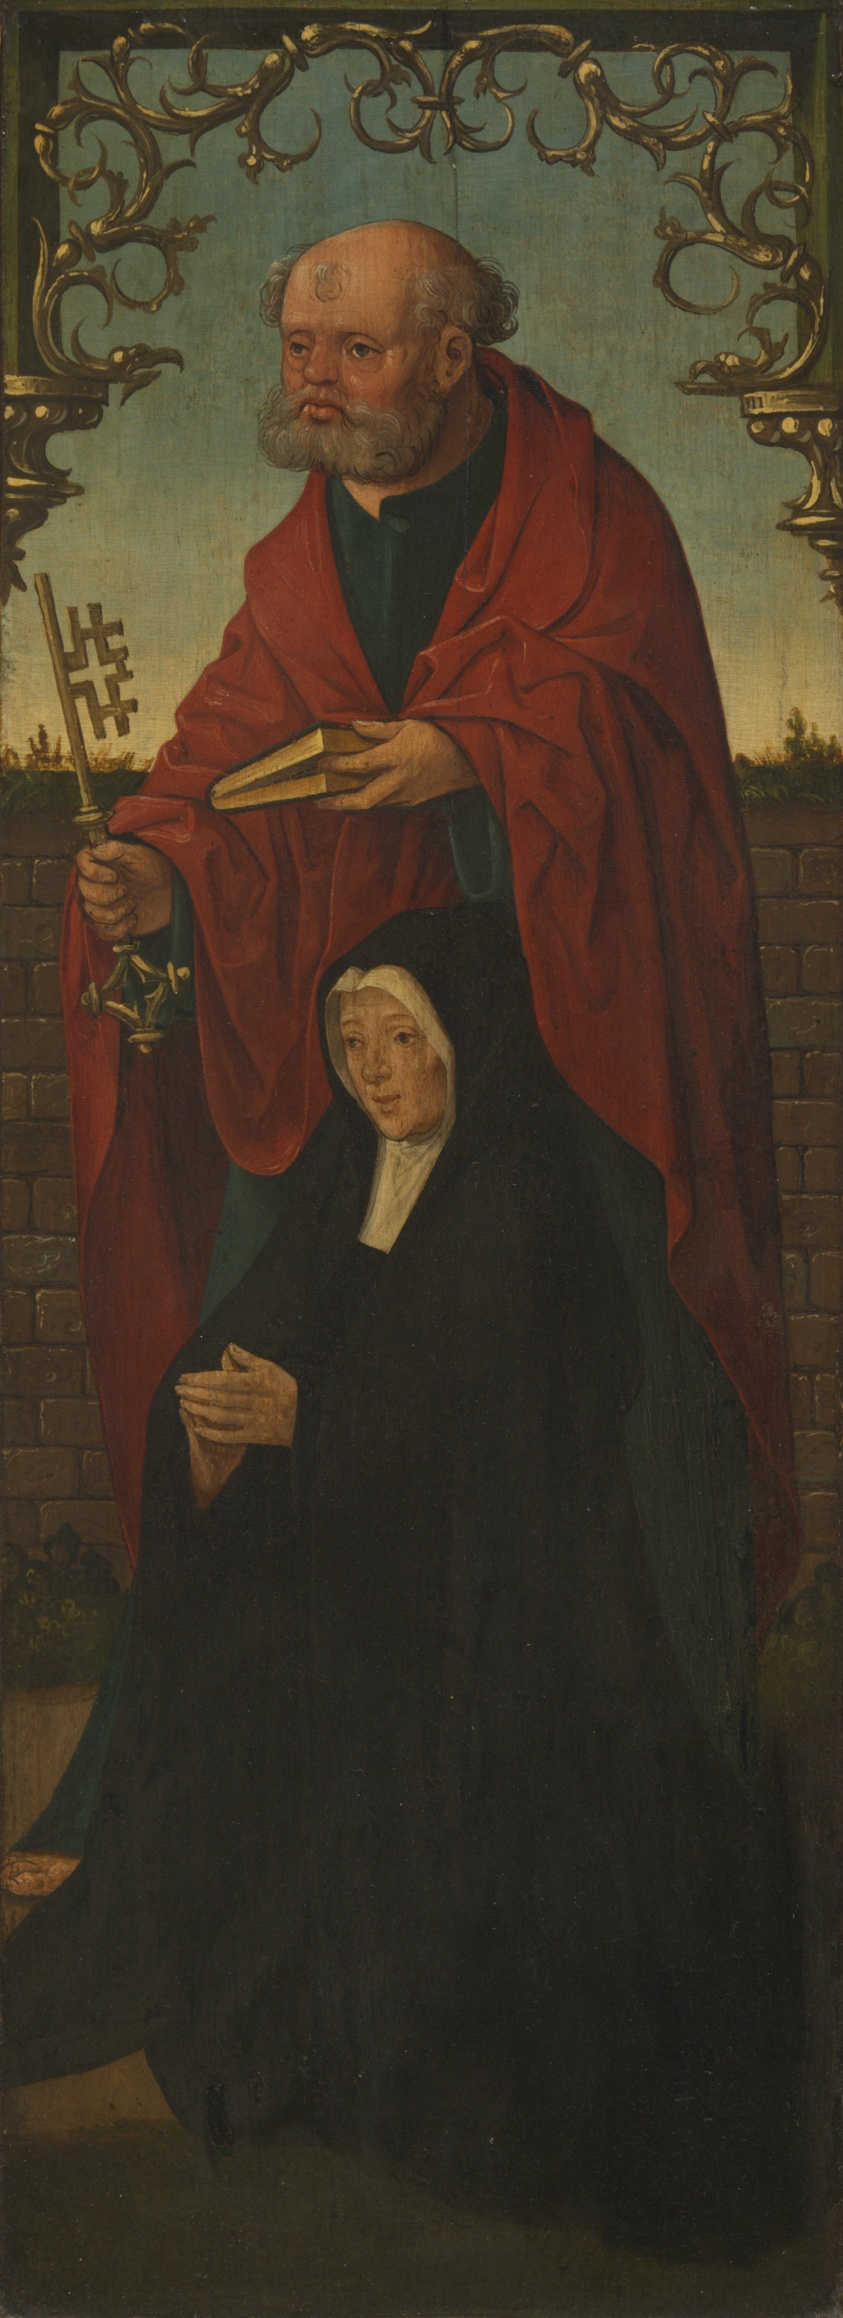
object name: Painting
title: Saint Peter and a Donor (recto); Saint Thomas (verso)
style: 16th Century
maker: Jacob Cornelisz. van Oostsanen (Netherlandish, c. 1470/75–by 1533); or Workshop of Jacob Cornelisz. van Oostsanen (Netherlandish, c. 1470/75–by 1533)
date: c. 1520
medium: Oil on panel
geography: Northern Netherlands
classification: painting; oil on panel; oil paintings (visual works); paint; european painting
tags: saints, prayer, religious, religion, Christianity, Christian subjects, Devotion, woman, man, Century of Progress, world's fairs, Chicago World's Fairs